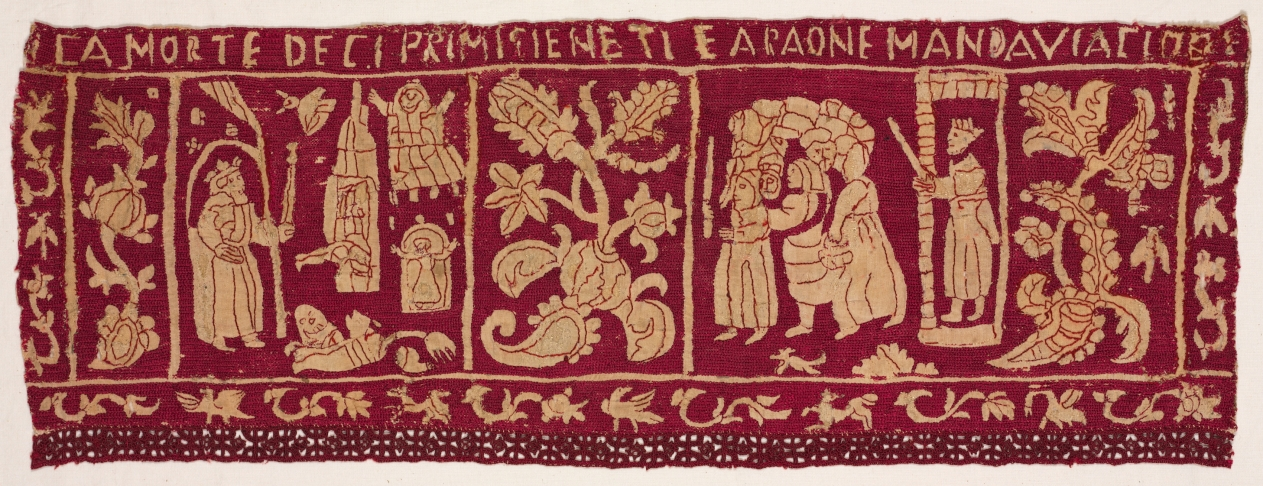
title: Embroidered Border: The Death of the First Born and the Israelites Sent Away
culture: Italy, 16th-17th century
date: 1500s-1600s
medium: Plain weave linen; embroidery in silk; attached border of needle lace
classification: Embroidery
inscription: Embroidered lettering in upper margin: LA MORTE DECI PRIMIGIENETI E ARAONE MAN[O]AVIACI[…]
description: The border fragments on the left tell the story of the Israelites baking unleavened bread during the first Passover, after which they were delivered out of captivity in Egypt. In the top panel, bakers mix and knead the dough; the bottom panel shows the bakers standing on a tiled floor while placing the bread into a brick oven. This common household scene would have been familiar to Italian audiences during the Renaissance. Two fragments depict events recorded in the book of Exodus. In the top panel, the pharaoh is shown releasing the Israelites after the last plague (1939.355). In the bottom panel, he changes his mind and pursues them across the parted Red Sea, only to be swallowed up after the Israelites safely crossed (1939.352).